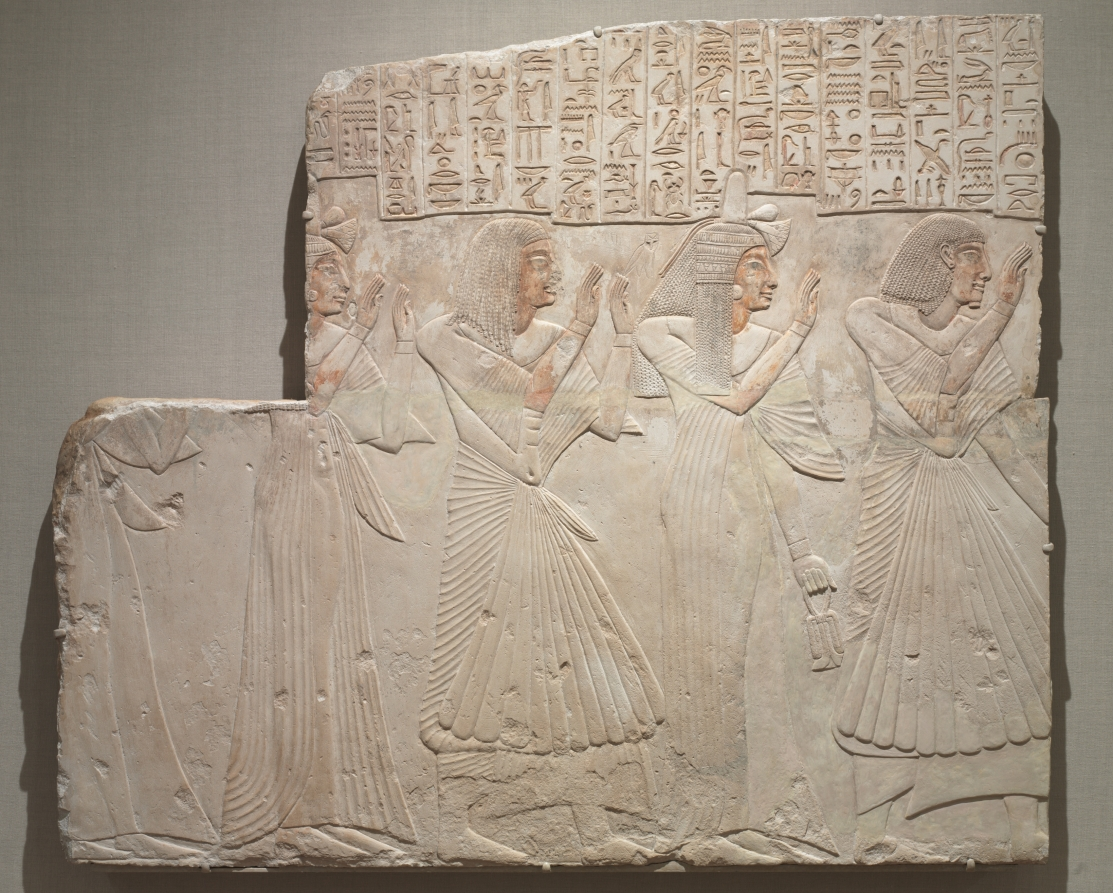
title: Tomb Relief of the Chief Physician Amenhotep and Family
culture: Egypt, Asyut, New Kingdom, (1540–1069 BCE), Dynasty 19, reign of Ramesses II (1279–1213 BCE)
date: c. 1279–1257 BCE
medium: limestone with traces of paint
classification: Sculpture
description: Ancient Egyptian medicine was held in high esteem, and doctors made a good living. In this scene, the chief physician Amenhotep leads his family in prayer. Arms uplifted in worship, they all wear intricately styled wigs and elaborately layered, pleated, billowing linen garments that were the height of fashion during the long and prosperous reign of Ramesses II. The faces have features typical of this period, including a long-nosed profile with small mouths and creases on the neck. Only the upper eyelids were modeled in relief; other details of the eyes were added in black and white paint. Amenhotep’s tomb chapel at Asyut was excavated in 1913–14 by the Egyptian Antiquities Service. Its reliefs are now divided among four cities. The right side of the wall directly adjoining the Cleveland relief is in Zurich, Switzerland. The other sections are in the Toledo Museum of Art and the Egyptian Museum, Berlin, Germany.